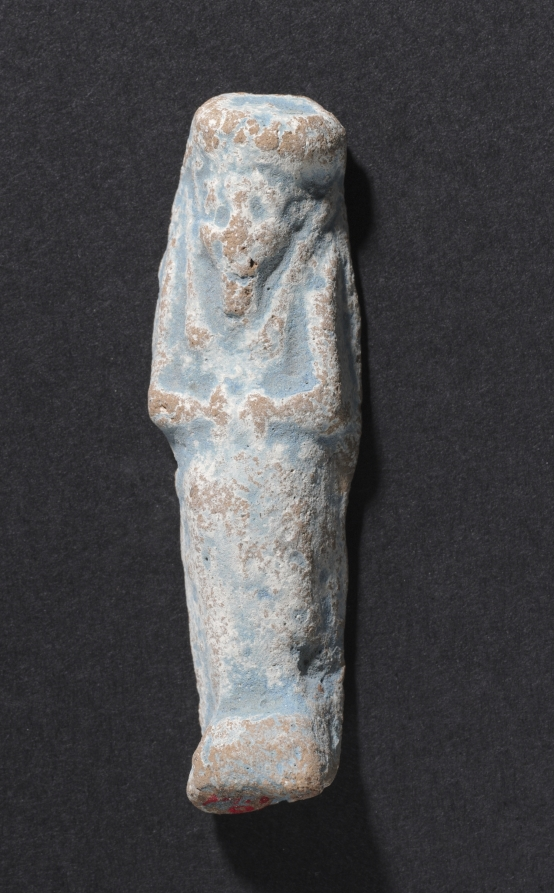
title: Shawabty of Ditamenpaankh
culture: Egypt, Late period (715–332 BCE), Dynasty 25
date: 715–656 BCE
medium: terracotta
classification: Funerary Equipment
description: High demand for shawabtys in the Late Period, a time when as many as 400 or more shawabtys were placed in the tomb with the deceased, gave rise to a specialized container for storing them: the shawabty box. This example is inscribed for the lady of the house, Ditamenpaankh, and was probably one of a pair originally made for her. The single-masted boat on the box's lid is perhaps an allusion to the pilgrimage of the deceased to the holy city of Abydos, the cult city of Osiris, king of the dead. The shawabtys inside are crude, mass-produced examples cast in an open mold. Made of terracotta, their blue paint imitates more costly shawabtys made of faience. As for the shawabty spell, it has been removed from its traditional location on the shawabty's front and relocated onto the sides of box, where it needed only to be written once, thus expediting production.